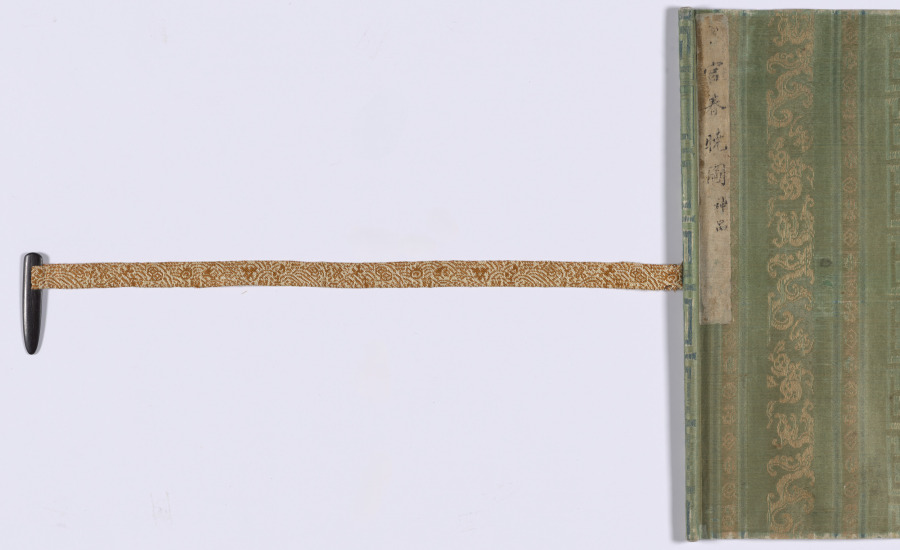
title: In the Palace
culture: China, Southern Song dynasty (1127-1279)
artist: after a work attributed to Zhou Wenju (Chinese, active 942–961)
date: before 1140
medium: Handscroll; ink and light color on silk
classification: Painting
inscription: 1 colophon and 13 seals: 1 colophon and 1 seal of Zheng Cheng 張澂 (d. 1143); 12 seals unidentified.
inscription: Colophon by Zhang Cheng 張澂 (d. 1143): 周文矩宮中圖婦人小兒其數八十，一男子寫神，而粧具、樂器、盆盂、扇椅席、鸚鵡、犬蝶不與。文矩句容人，為江南翰林待詔。作士女體近周昉，而加纖麗。嘗為後主畫南莊圖，號一時絕筆。它日上之朝廷，詔籍之祕閣。宮中圖云是真蹟，藏前太府卿朱載家。或摹以見餽。婦人高髻自唐以來如此。此卷豐肌長襦裙，周昉法也。予至嶠南，於端溪陳高祖之裔，見其世藏諸帝像，左右宮人梳髻與此畧同。而丫鬟乃作兩大鬟，垂 肩項間，雖醜而有真態。李氏自謂南唐，故衣冠多用唐制，然風流寔承六朝之餘。畫家者言辨古畫當先問衣冠車服，蓋謂是也。紹興庚申五月乙酉澹嵒居士題。 印：張澂印章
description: In the Palace depicts 13 ladies of the imperial household, three servants, and six children in fluent baimiao (plain drawing) brushwork, accentuated by color. The women entertain themselves by making music, tending children, and playing with pets. Their elaborate hairstyles, plump figures, and flowing robes are reminiscent of Tang dynasty fashion. The scroll illustrates elegant court life and is a direct copy of the original by Zhou Wenju (active 940–75) from Zhenjiang, Jiangsu province. Zhou was employed at the Southern Tang court in Nanjing under Emperor Li Yu (reigned 961–76), a prolific poet.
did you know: The ladies' elaborate hairstyles, plump figures, and flowing robes are reminiscent of Tang dynasty fashion.